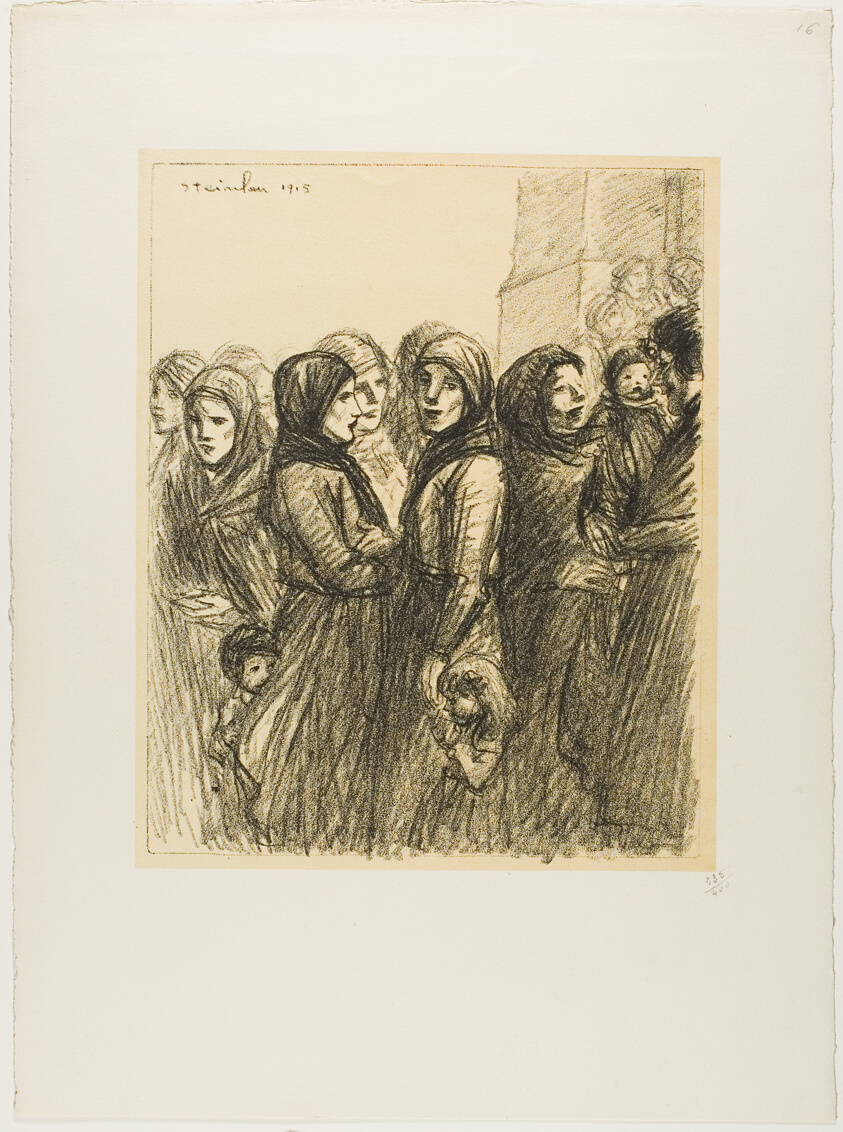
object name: Print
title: Military Allocation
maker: Théophile-Alexandre Steinlen; French, born Switzerland, 1859-1923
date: 1915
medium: Lithograph in black over a fawn tint on thick off-white wove paper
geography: France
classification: lithograph; print; prints and drawing